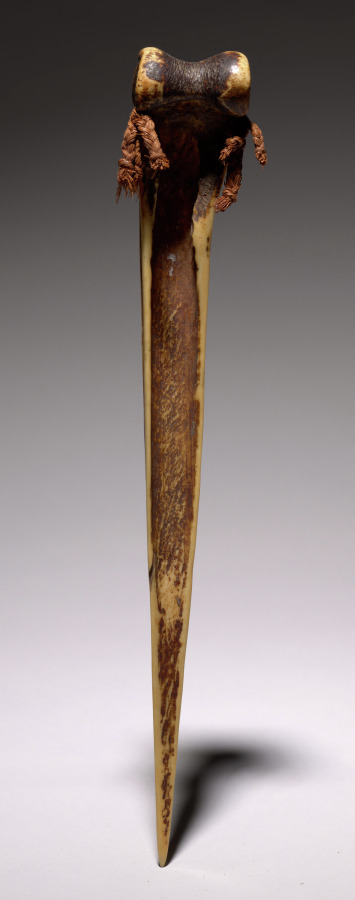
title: Dagger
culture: Melanesia, Papua New Guinea, Sepik River region, 19th century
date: c. 1880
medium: cassowary bone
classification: Sculpture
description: This dagger is decorated with an incised human face and a geometric pattern.